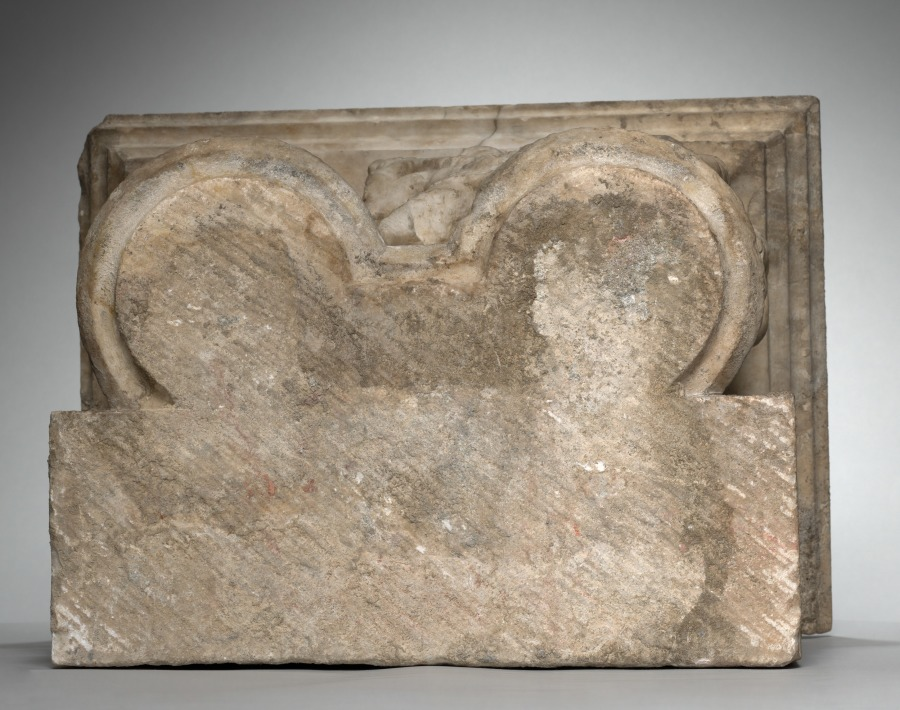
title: Engaged Capital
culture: Southern France, Abbey of Larreule, near Tarbes, 15th century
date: 1400s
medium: limestone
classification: Sculpture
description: This capital belongs to a surviving group including other architectural fragments that once decorated the cloister of the Abbey of Larreule. A cloister was a covered walkway or arcade, usually around all four sides of a square area of grass (the "cloister garth"). The seclusion of the cloister was the monks’ exclusive domain, off limits to others. Here, the monks were supposed to pray, study, meditate, and exercise in privacy and solitude. Such cloister capitals served both to instruct the monks and as a focus for their devotions. Other capitals in this series are installed in the Jardin Massey at Tarbes, near the original abbey. An arch from Larreule has been assembled with other associated French capitals at The Cloisters in New York.